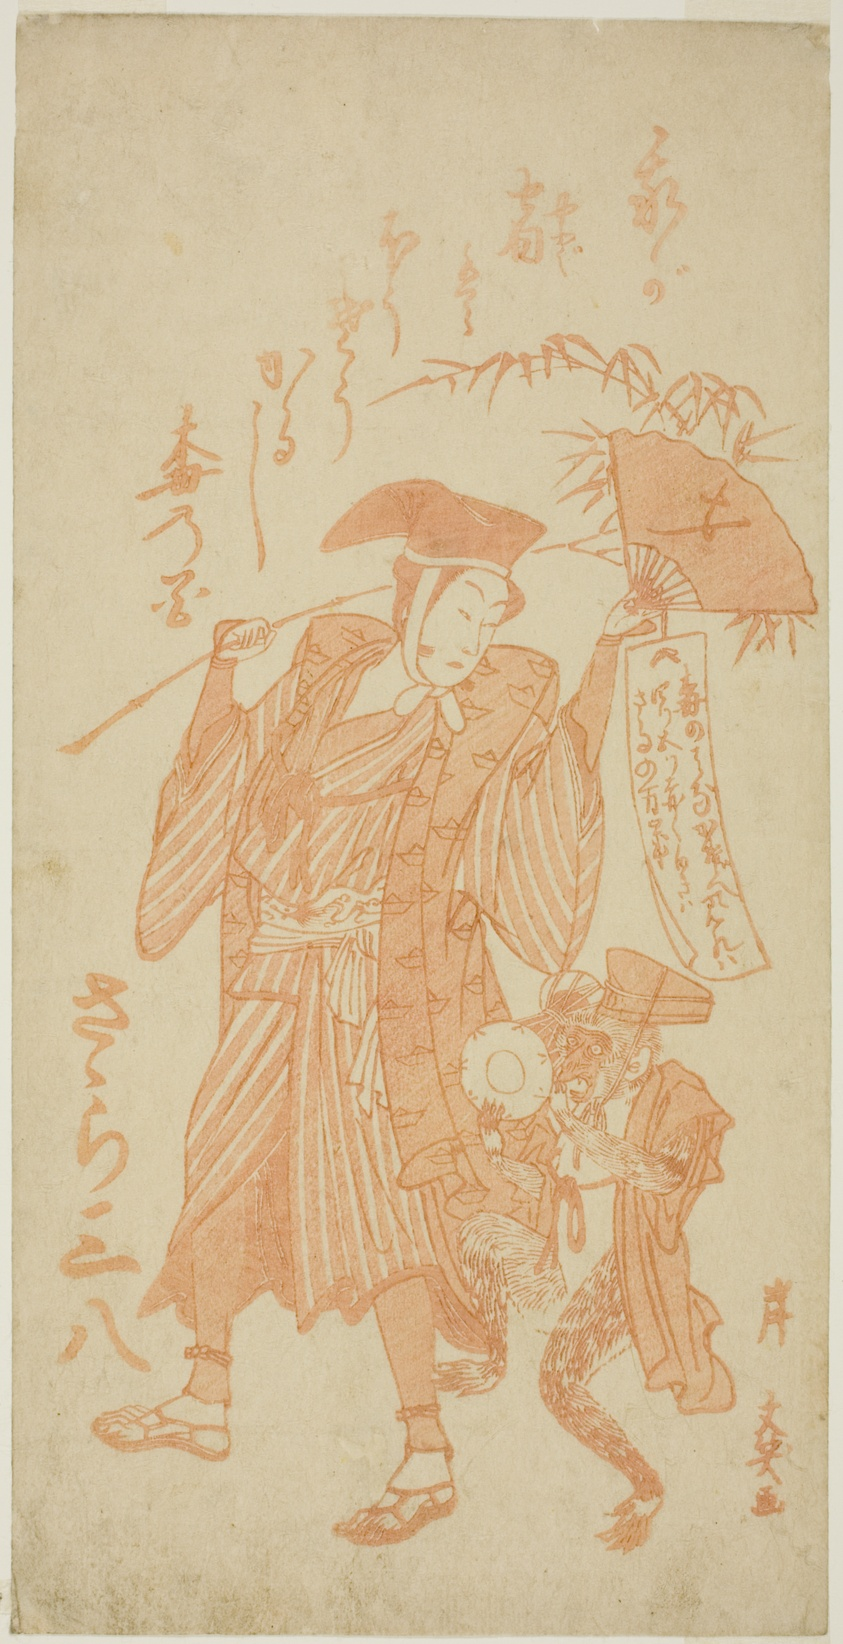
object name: Print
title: Monkey Trainer with a Monkey at the New Year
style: Japanese (culture or style)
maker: Kishi Bunsho; Japanese, 1754-1796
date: c. 1780s (1782?)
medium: Color woodblock print; hosoban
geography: Japan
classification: woodblock print; print; asian art